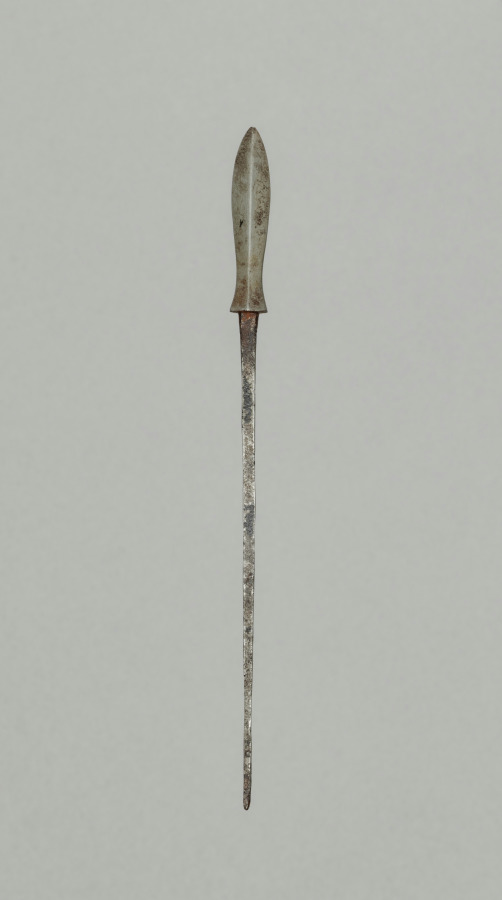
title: Arrow Point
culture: Japan, Edo period (1615–1868)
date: 1700s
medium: steel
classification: Arms and Armor